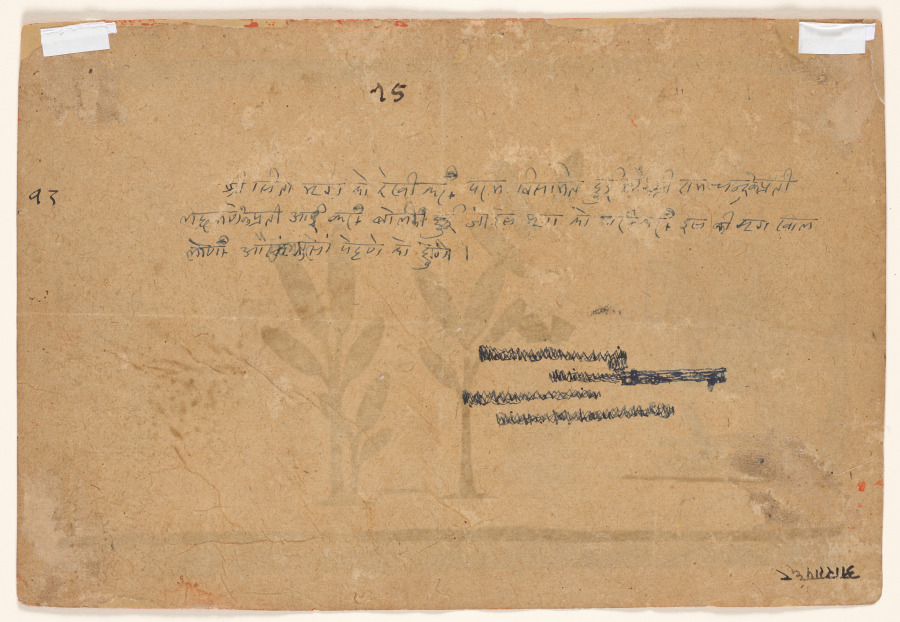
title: Sita asks Rama to fetch the golden deer, from the “Shangri” Ramayana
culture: Northern India, Pahari kingdoms, Himachal Pradesh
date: c. 1700–1725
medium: Gum tempera, ink, and gold on paper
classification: Painting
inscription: Recto: Mandiali Takri inscription in the margin on recto, quoting the passage from the Ramayana depicted in the painting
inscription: Verso: in Devanagari Araṇya 68; rewritten quotation of the Ramayana passage; Takri numbers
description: Sita exclaims to Rama, “What an exquisite deer! He has stolen my heart away. Please catch him for me, my great-armed husband. He shall be our plaything. . . . Never before have we seen an animal such as this. His body sparkles with different colors and is speckled with chips of precious stones; he illuminates the entire forest, for with his golden hide and horns of precious gems, he shows all the brilliance of the morning sun, all the luster of the starry heavens.” Lakshmana is suspicious and warns against having anything to do with the enchanting deer.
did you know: The spots on the golden deer show that it shimmers with multiple colors.